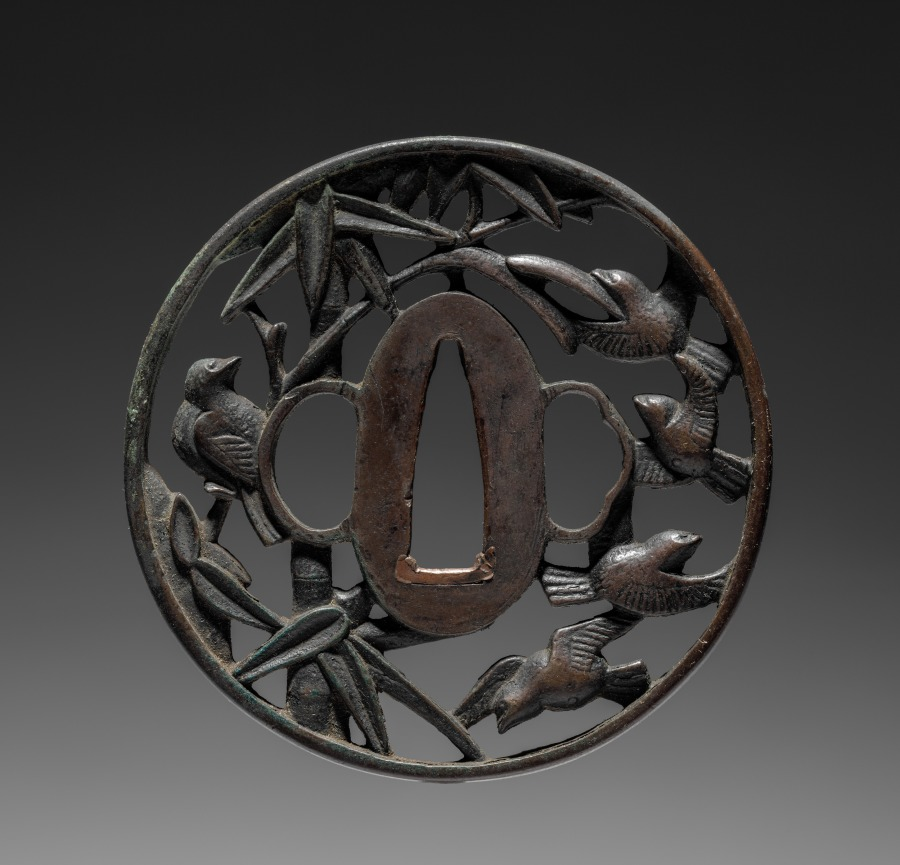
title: Sword Guard (Tsuba) with Birds in Bamboo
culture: Japan, possibly Edo period (1615-1868)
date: c. 1615–1868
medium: bronze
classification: Arms and Armor